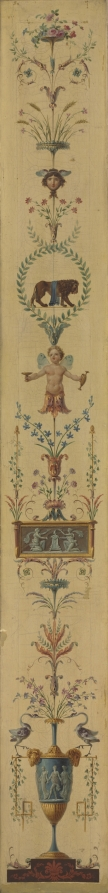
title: Decorative Panel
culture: France, 18th century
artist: Pierre Rousseau (French, 1751–1829)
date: 1790s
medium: oil on canvas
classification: Painting